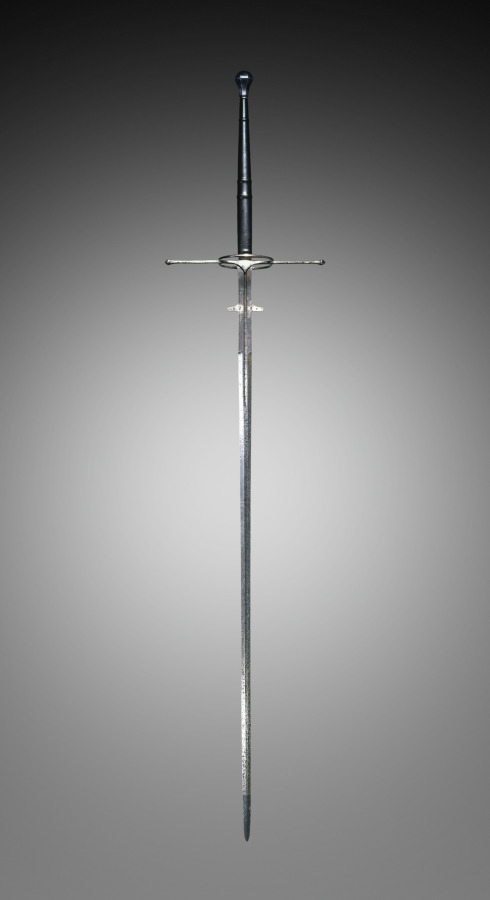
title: Two-Handed Sword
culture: Spain, Toledo, second half of 16th Century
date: 1550–1600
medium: steel, wood and leather grip; fluted pommel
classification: Arms and Armor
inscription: TOLEDO and IVAN LVIS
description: The two-handed sword, originally a weapon of war for specialist infantry, is so named because two hands were required to wield it. By the late 1600s, these enormous swords assumed a largely ceremonial or bodyguard function.